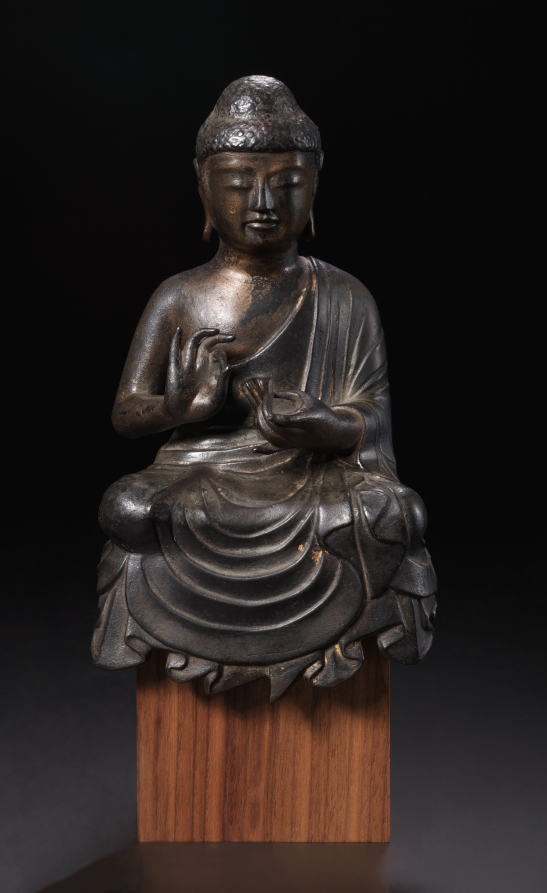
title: A Preaching Buddha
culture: Japan, Nara period (710–94)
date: 700s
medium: bronze with traces of gilt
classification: Sculpture